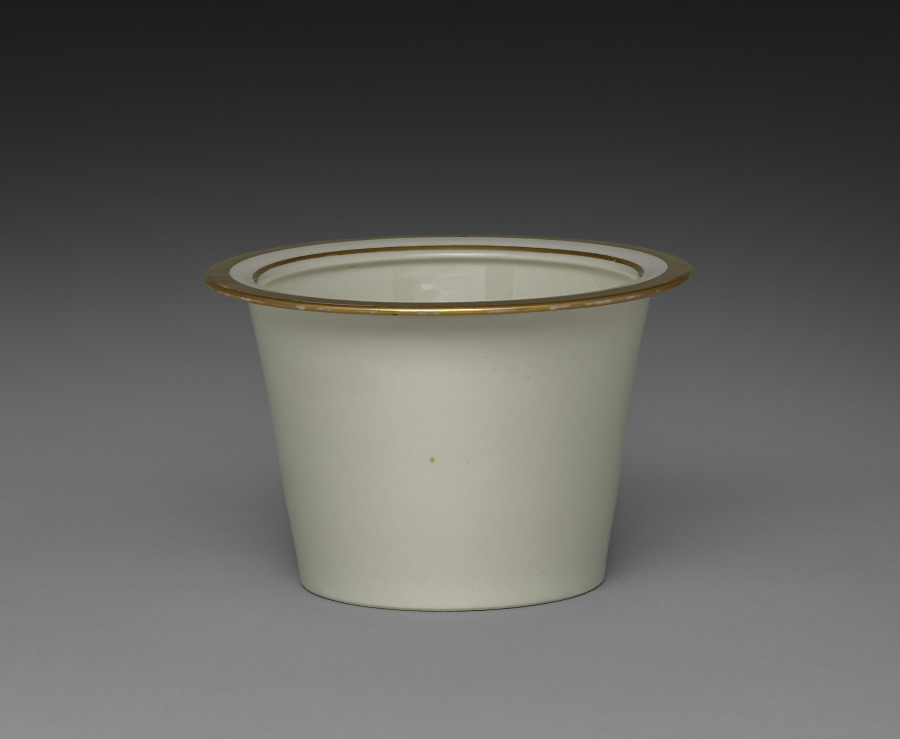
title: Liner for an Ice Cream Pail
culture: France, Paris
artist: Factory of Jacob-Petit (French, 1830–1865)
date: c. 1840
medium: gilt porcelain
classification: Ceramic